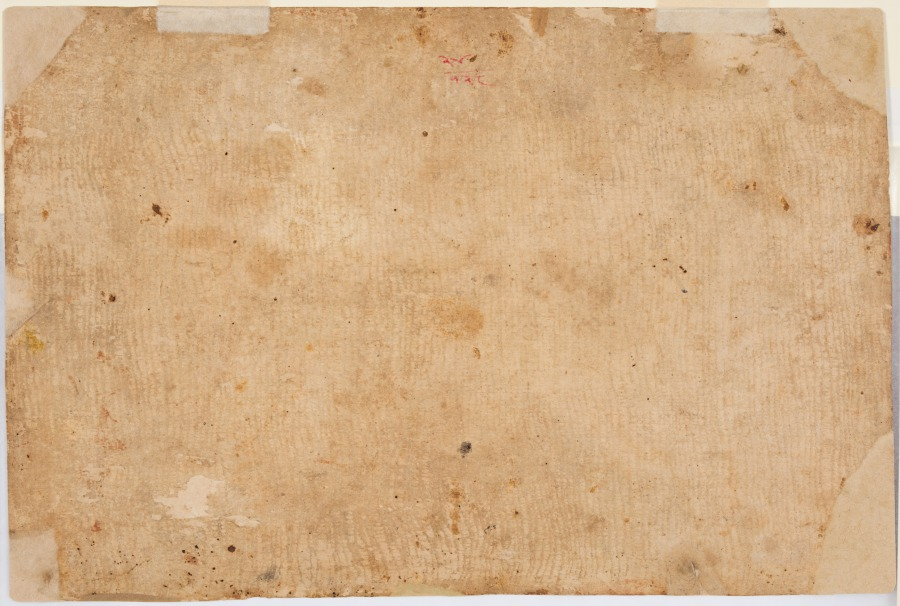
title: Prince Amar Singh (1672–1710) Drives His Own Elephant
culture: Northwestern India, Rajasthan, Rajput Kingdom of Mewar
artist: attributed to Mewar Stipple Master (Indian)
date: c. 1695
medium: gum tempera and gold on paper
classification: Painting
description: A youthful prince clad in yellow jama (belted tunic) holds a goad in his hand to control his elephant. His attendant sits in the back holding the royal insignia, a flying whisk, which billows in response to the velocity with which the elephant is running. The background of the painting is monochromatic green, a highly corrosive pigment.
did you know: The tusk of the elephant is decorated with a gold ring.